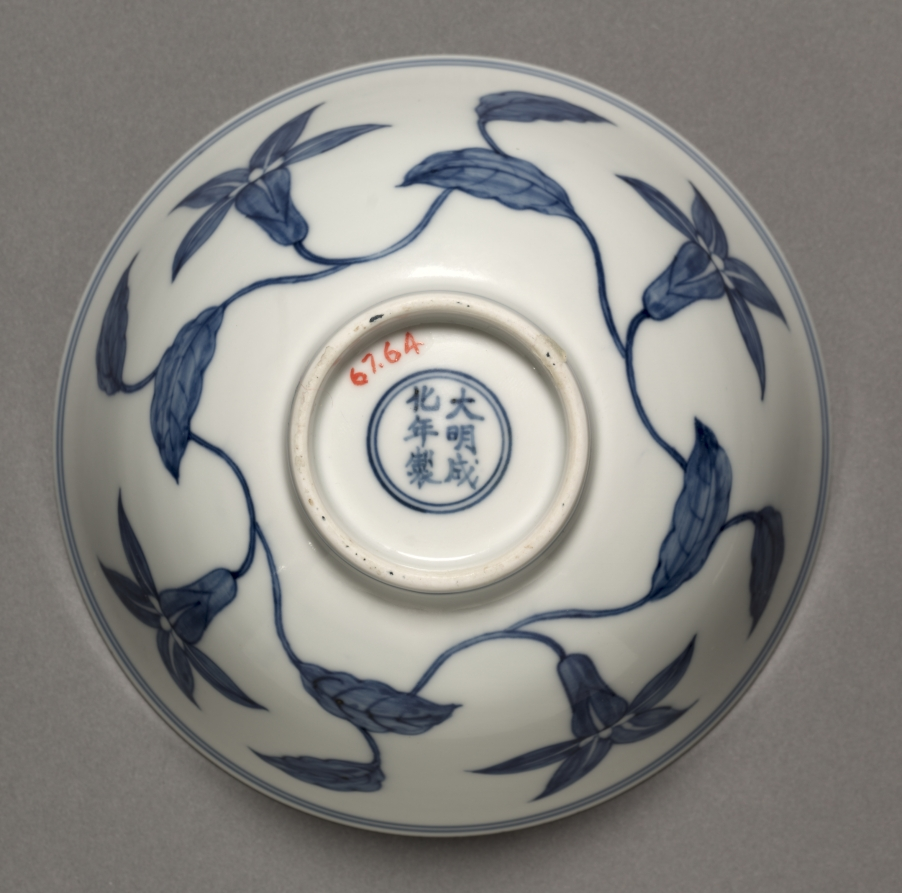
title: Bowl with Lily Scrolls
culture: China, Jiangxi province, Jingdezhen, Ming dynasty (1368–1644), Chenghua mark and period (1465–87)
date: 1465–87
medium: porcelain with underglaze blue decoration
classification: Ceramic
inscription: 大明成化年製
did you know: Gently curving arabesque scrolls of lilies and leaves decorate the inside and outside of this bowl.